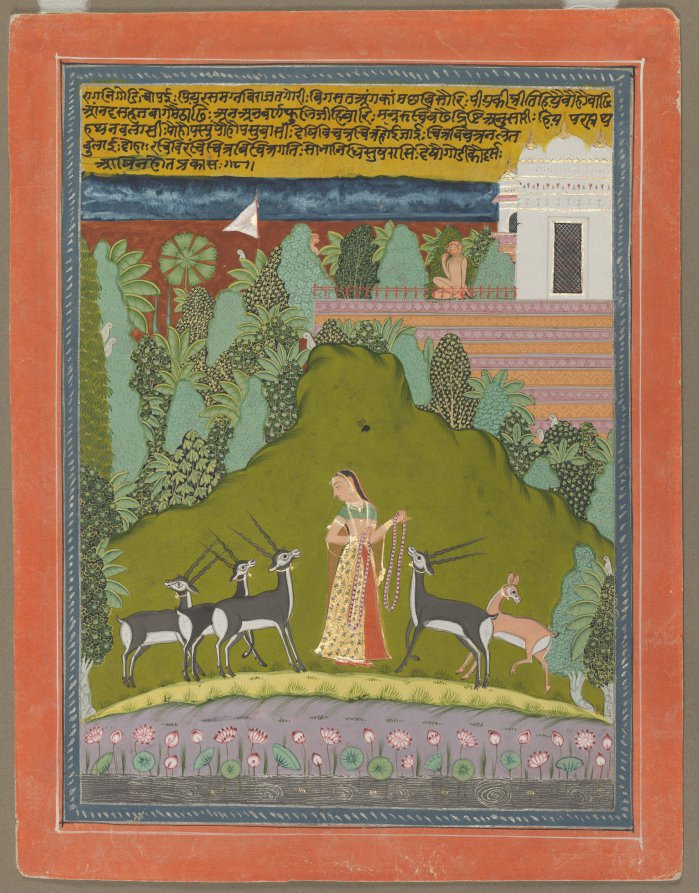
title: Gaudi Ragini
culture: India, Rajasthan, probably Jaipur, 18th century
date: c. 1700–1725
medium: Gum tempera, ink, and gold on paper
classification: Painting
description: Adept in the arts of love, according to the verse, a sixteen-year-old girl “tarries in the garden, confused of mind,” holding flowers from the wishing tree, no companion with her. Four black bucks seem to have emerged from the dense woods, attracted to her, while monkeys leer at her from above. The shining white architecture atop sherbet-hued walls and the tall peaked hill are characteristic of paintings from the Rajput kingdom of Amber, which would later be renamed Jaipur. The music of Gauri Ragini is intended to be enjoyed during the winter months.